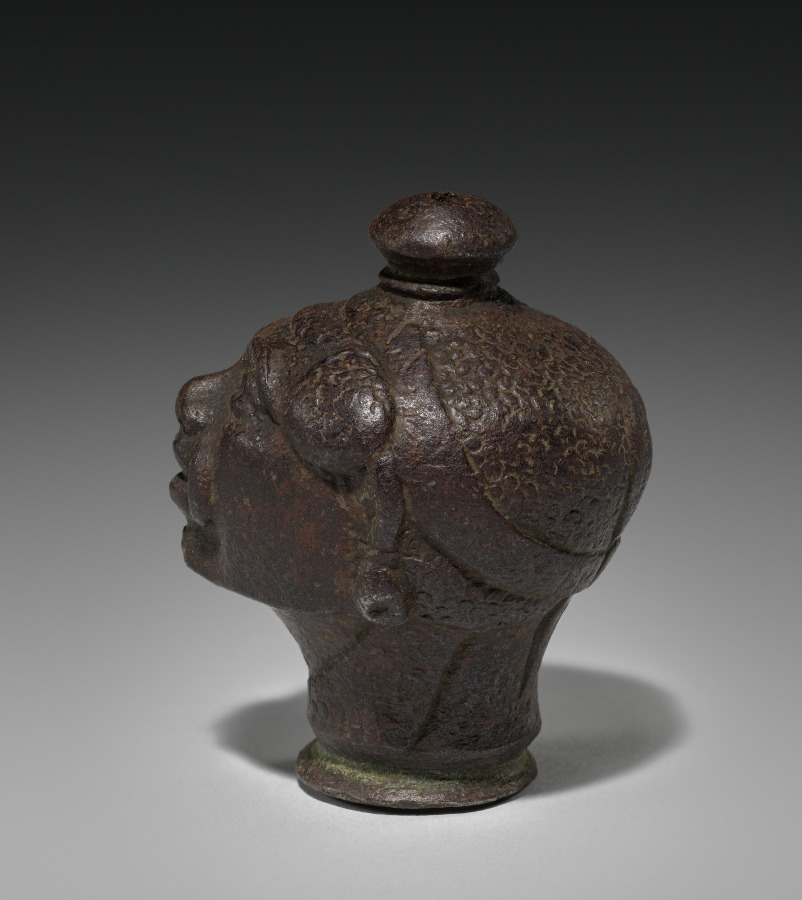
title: Pommel of Sword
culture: Italy, 17th century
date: 1600s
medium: steel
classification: Arms and Armor